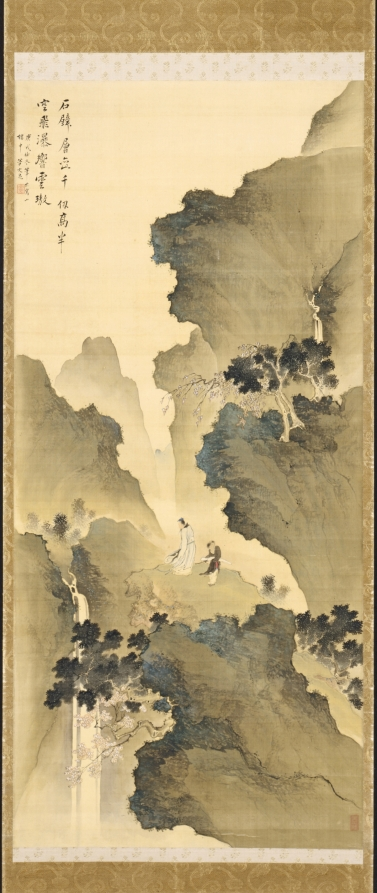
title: Gazing at a Waterfall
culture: Japan, Edo period (1615–1868)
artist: Tani Bunchō (Japanese, 1763–1841)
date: 1790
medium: hanging scroll; ink and color on silk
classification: Painting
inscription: The stone cliff of layered rocks is extremely high. Waterfalls tumbling from the skies reverberate in the clouds.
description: Artist Tani Bunchō painted this image in a mountain pavilion during winter. He inscribed it with two lines of a poem: “The stone cliff of layered rocks is extremely high. Waterfalls tumbling from the skies reverberate in the clouds.” The scholarly figure and attendant carrying his qin (a stringed instrument) are set amid majestically soaring mountains in China. For many people in Japan at the time, the image would call to mind a poem about a waterfall at Mount Lu by Chinese poet Li Bai (701–762).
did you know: Drive about eight hours west of Shanghai to get to Mount Lu, the mountain range likely alluded to in this painting.